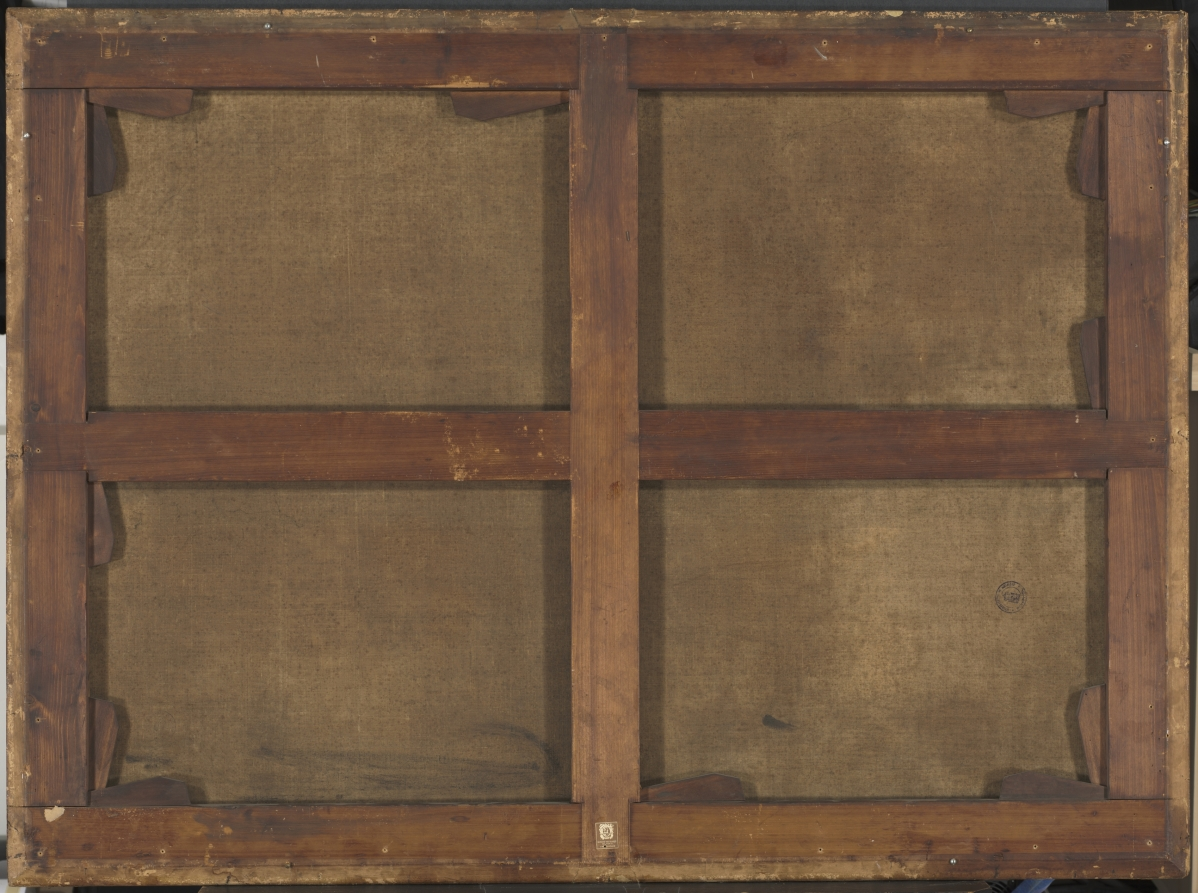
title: Rush Gatherers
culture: Netherlands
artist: Nicolaes Berchem (Dutch, 1620–1683)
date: 1657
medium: oil on canvas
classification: Painting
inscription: Signed lower left: "CBerchem / 1657 [CB in monogram]"